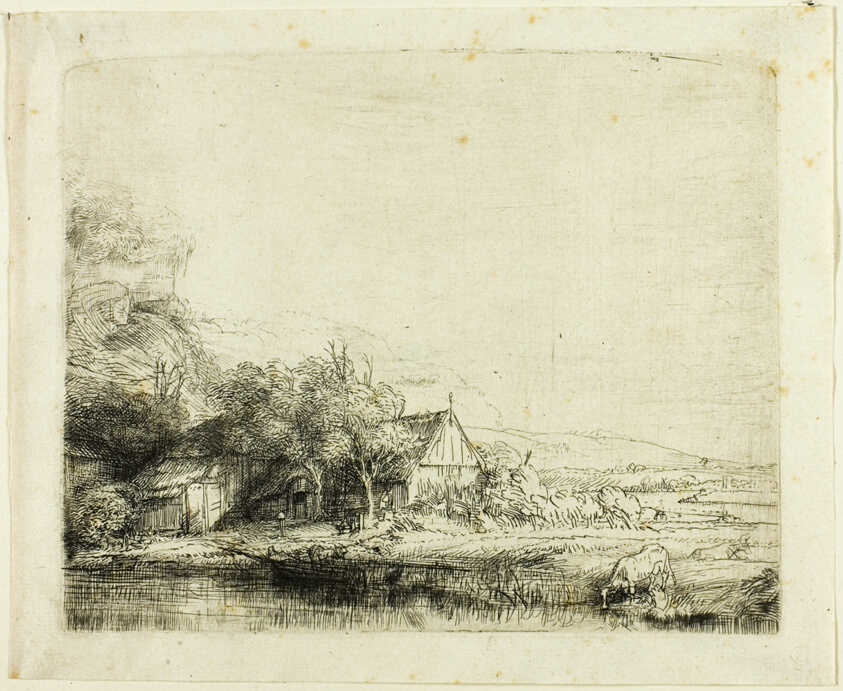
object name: Print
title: Landscape with a Cow Drinking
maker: Rembrandt van Rijn (Dutch, 1606-1669)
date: c. 1650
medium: Etching and drypoint on ivory laid paper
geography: Holland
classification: etching; print; prints and drawing; paper; drypoint